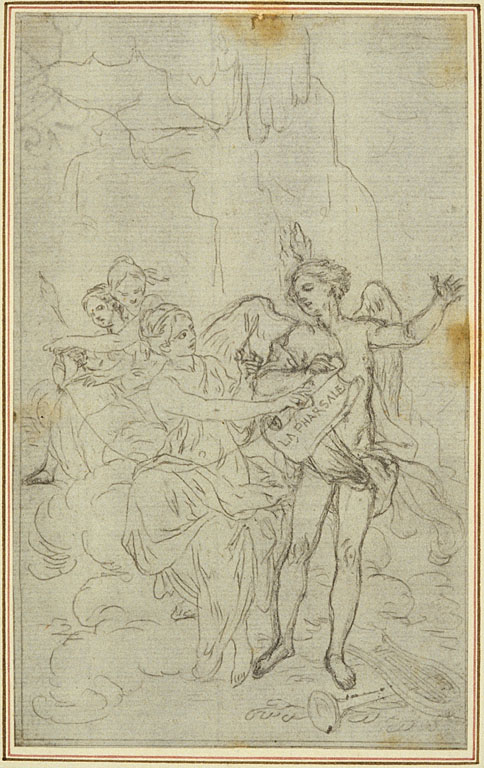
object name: Drawing and Watercolor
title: Study: Vignette-Frontispiece for Lucain's "La Pharsale"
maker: Hubert François Gravelot (French, 1699-1773)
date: c. 1766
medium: Pen and black ink, with graphite, on gray laid paper, incised for transfer, and perimeter mounted on cream laid paper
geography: France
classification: graphite; drawings (visual works); prints and drawing